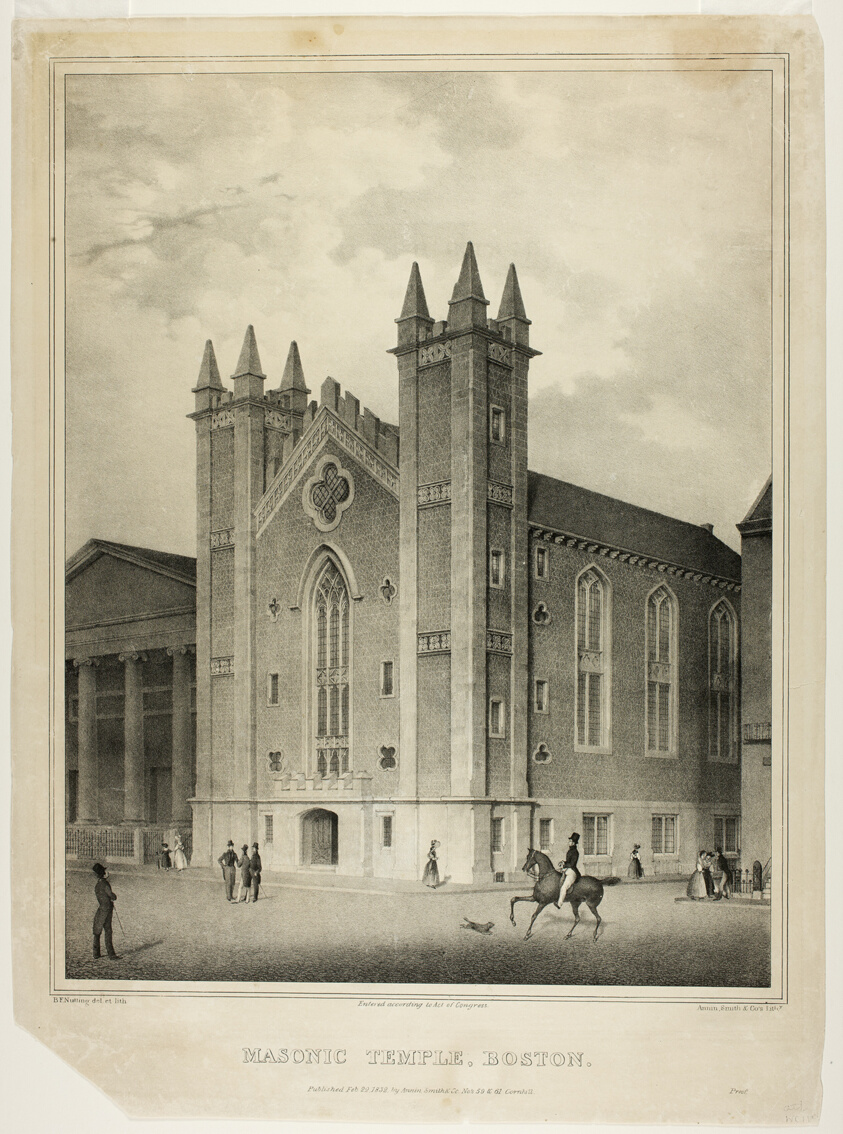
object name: Print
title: Masonic Temple, Boston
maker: Benjamin F. Nutting (American, 1826-1884)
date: 1832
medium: Lithograph on cream wove paper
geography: United States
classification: lithograph; print; prints and drawing